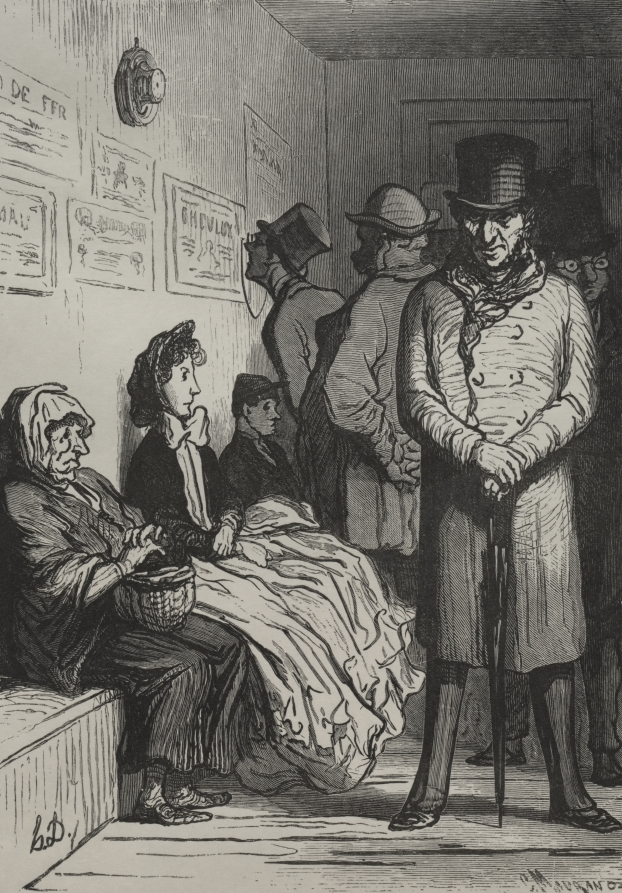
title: An Omnibus Waiting Room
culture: France, 19th century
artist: Honoré Daumier (French, 1808–1879)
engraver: Charles Maurand (French, 1824–1904)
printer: François Louis Schmied (Swiss, 1873–1941)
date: 1862, printed 1920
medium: wood engraving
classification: Print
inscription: Lower margin, in pencil: 68/75 ; red stamp: FLS